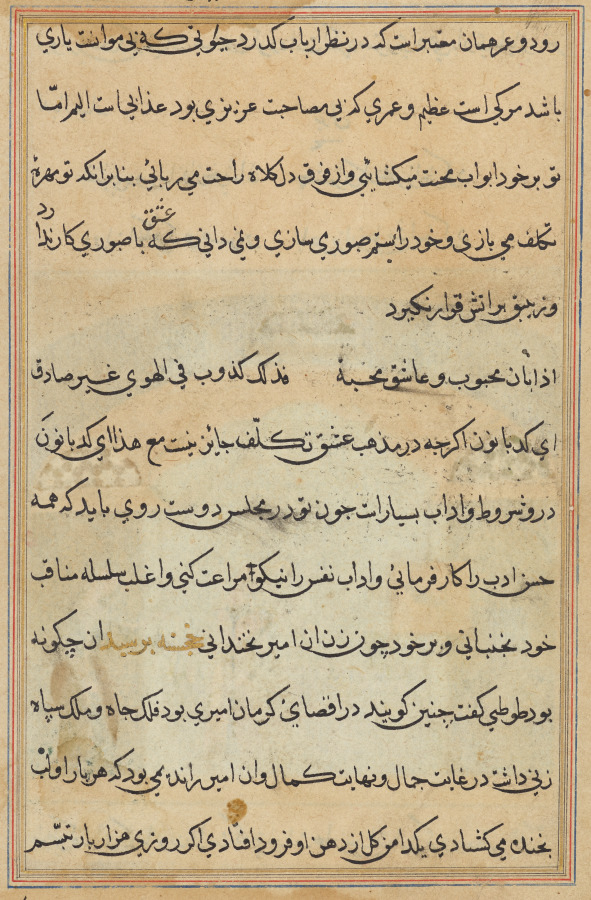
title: Page from Tales of a Parrot (Tuti-nama): text page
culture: Mughal India, court of Akbar (reigned 1556–1605)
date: c. 1560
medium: gum tempera, ink, and gold on paper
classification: Painting